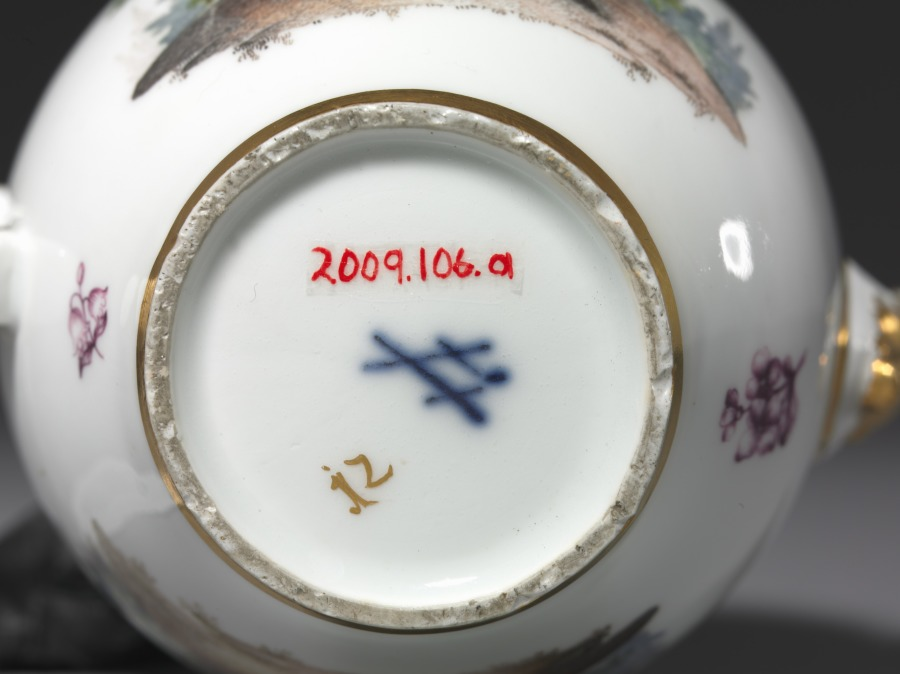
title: Teapot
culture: Germany, Meissen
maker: Meissen Porcelain Factory (German, est. c. 1710)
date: c. 1750–70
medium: porcelain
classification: Ceramic